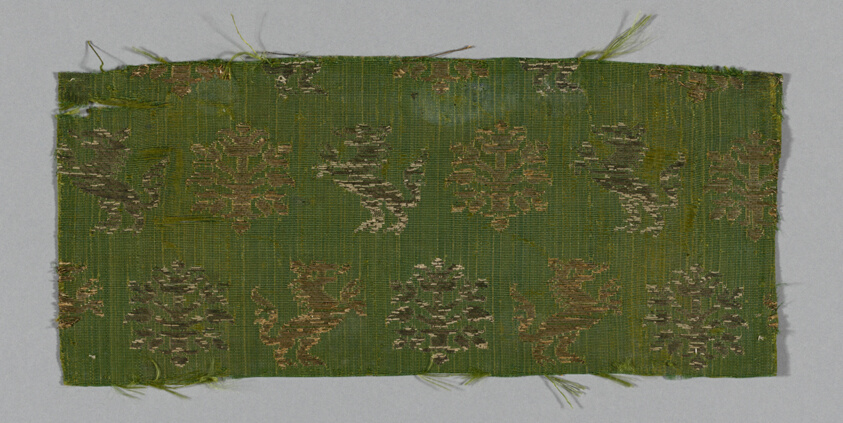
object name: Textile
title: Fragment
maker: Italy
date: 1625/75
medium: brocaded silk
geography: Italy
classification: textile; weaving